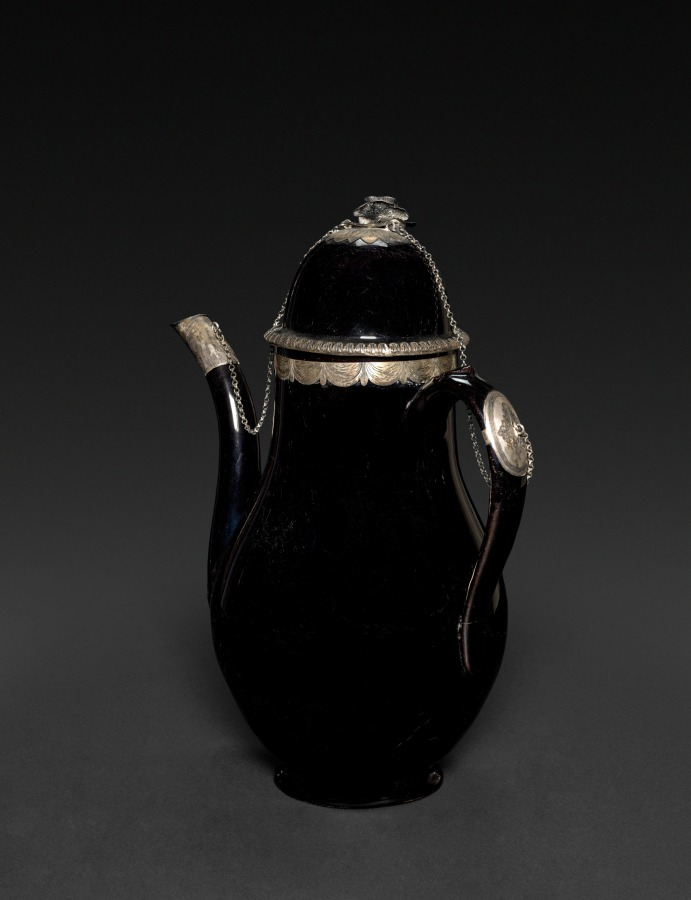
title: Coffee Pot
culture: Belgium, Namur(?), 18th century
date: c. 1780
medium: glazed stoneware with silver colored metal mounts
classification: Ceramic